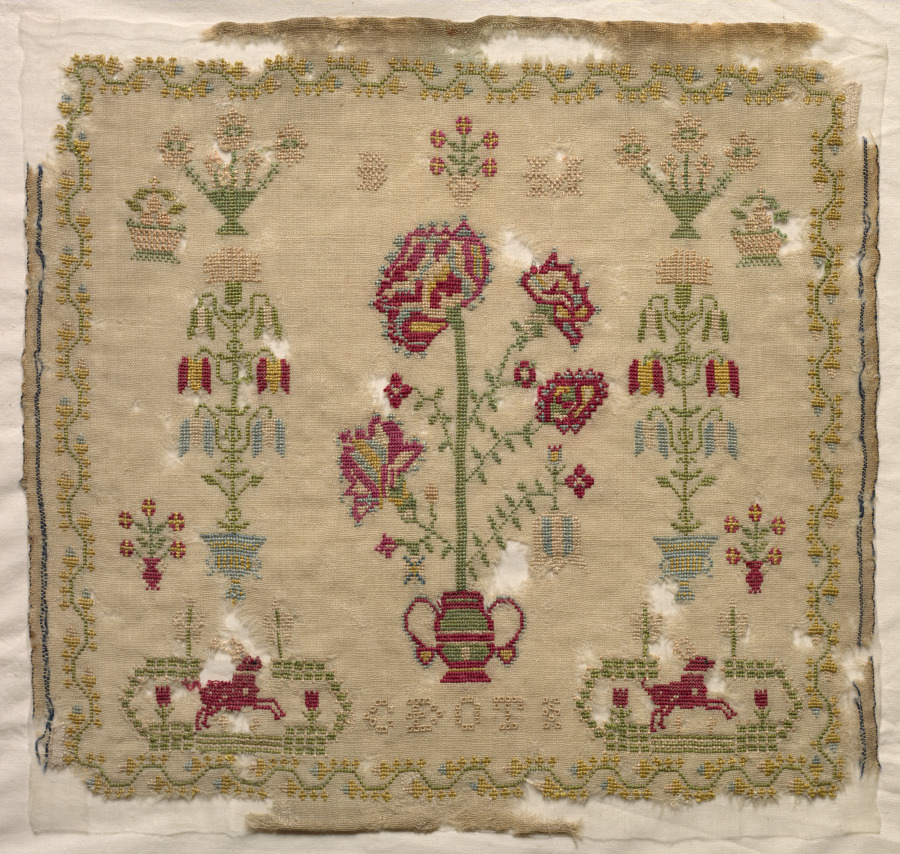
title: Sampler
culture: England, early 19th century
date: early 1800s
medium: embroidery on wool ground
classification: Sampler